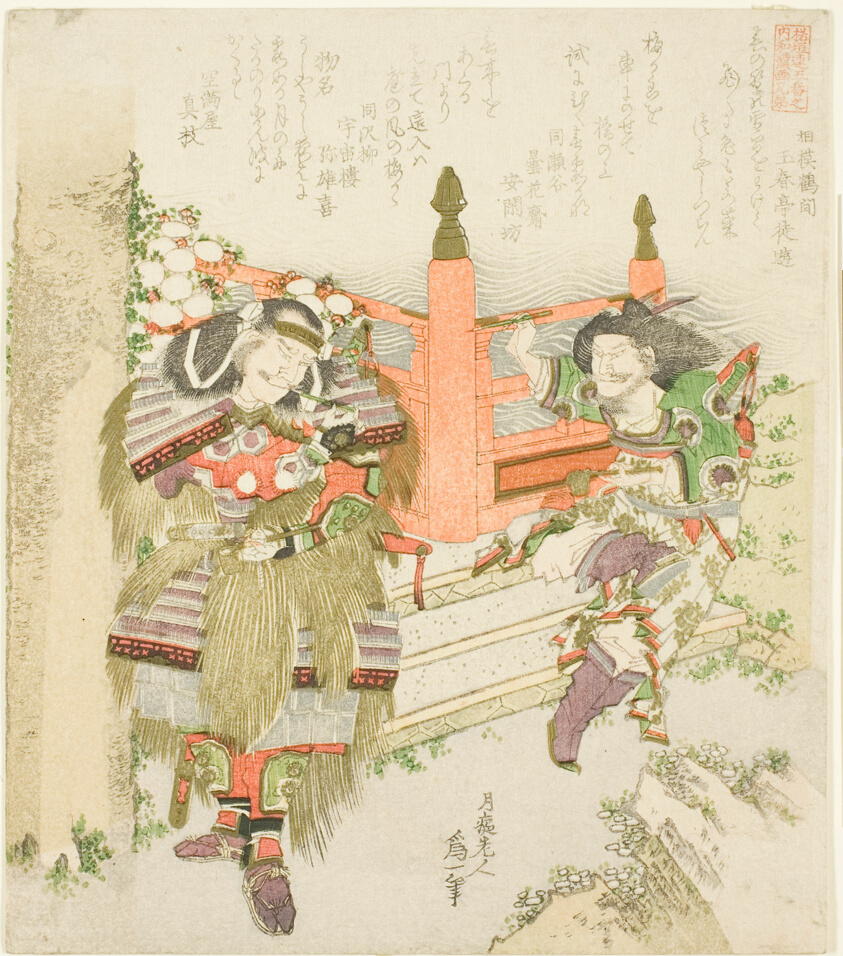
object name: Print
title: Lin Xiangru and Kojima Takanori, from the series "Five Sibling Pictures of China and Japan for the Zakurogaki Group (Zakurogaki-ren goban no uchi wakan e-kyodai)"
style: Japanese (culture or style)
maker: Katsushika Hokusai 葛飾 北斎; Japanese, 1760-1849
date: 1821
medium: Color woodblock print; shikishiban, surimono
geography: Japan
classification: woodblock print; print; asian art